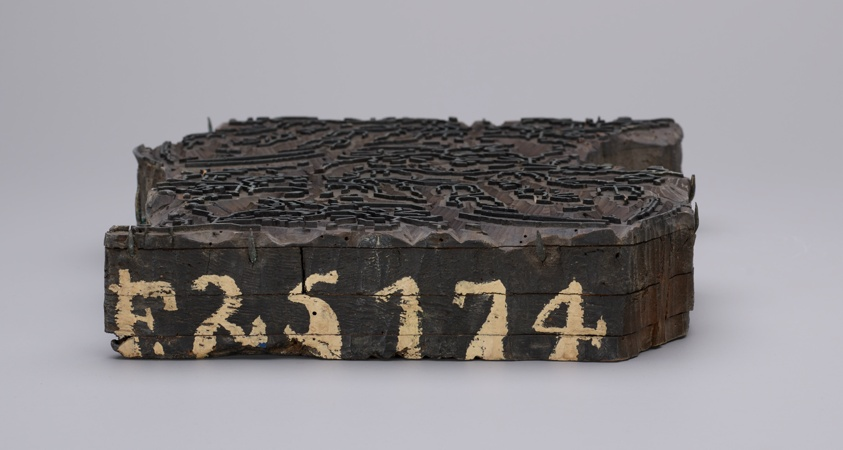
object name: Textile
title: Six Printing Blocks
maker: England or France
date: before 1850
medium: Carved wood, treated in a variety of techniques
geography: England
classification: printing blocks (printing surfaces); textile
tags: paisley